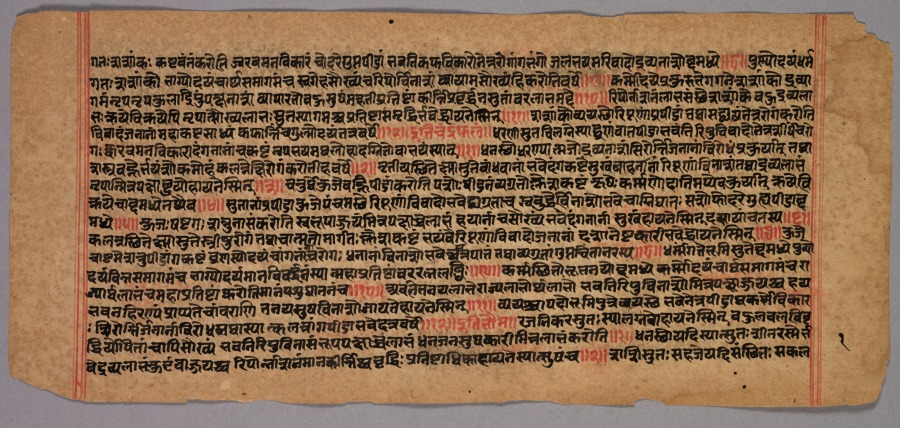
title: Pages from a Jaina Manuscript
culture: India, 15th-16th century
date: 1400s–1500s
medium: ink on paper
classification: Manuscript